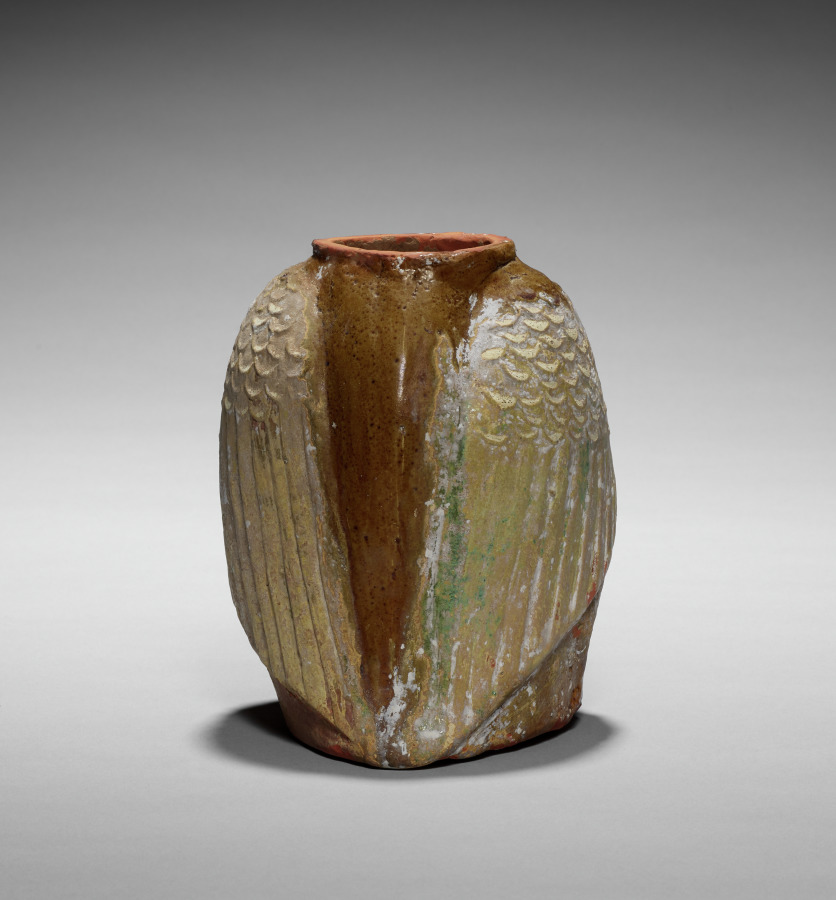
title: Owl-shaped Jar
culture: China, Henan province, Western Han dynasty (206 BCE–8 CE)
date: 206 BCE–9 CE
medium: Amber-brown glazed low-fired pottery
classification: Ceramic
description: Pottery vessels in the shape of owls were made since Neolithic times and throughout the Bronze age. These jars in the form of vigilant owls may have provided a tomb occupant with grain in the afterlife. However, the meaning of these mysterious birds and the association of the owl motif with burial sites in China is not fully understood.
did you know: The jar cover is modeled in the shape of an owl's head.